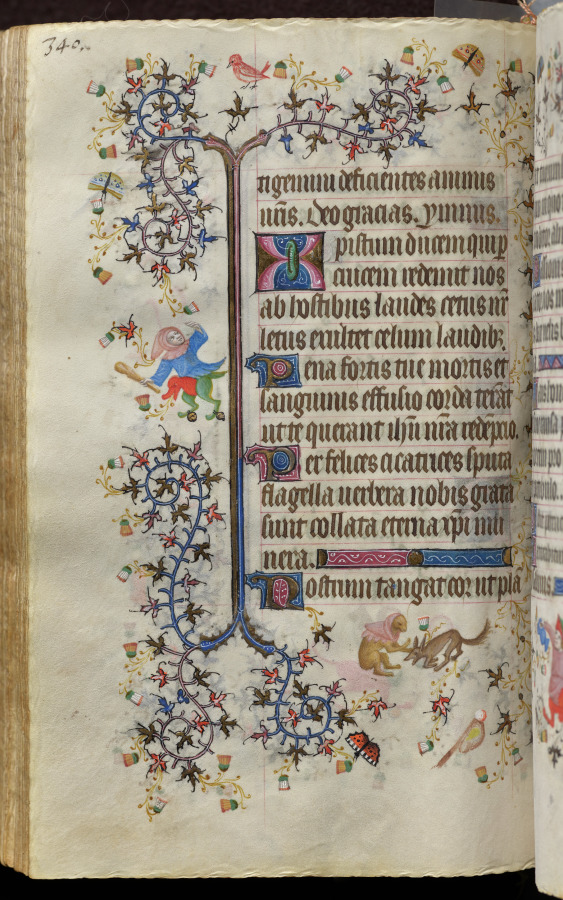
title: Hours of Charles the Noble, King of Navarre (1361-1425): fol. 165v, Text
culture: France, Paris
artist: Master of the Brussels Initials and Associates (French)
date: c. 1405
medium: ink, tempera, and gold on vellum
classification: Bound Volume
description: This precious volume was obviously highly prized by its owner, the French-born King of Navarre, who had his coat of arms painted on no less than twenty folios. Rather than directly commissioning this manuscript from a specific workshop, it seems that Charles the Noble acquired his book of hours -- perhaps ready-made for the luxury market -- while on a trip to Paris in 1404-05. A collaborative effort, six painting styles are evidenced within the pages of this codex, those of two Italians, two Frenchmen, and two Netherlanders. The painter who was responsible for the planning and decoration of the book, and who produced seventeen of the large miniatures, was a Bolognese artist known as the Master of the Brussels Initials. His principal assistant, responsible for most of the borders, was a Florentine who signed his name "Zecho" da Firenze on folio 208 verso.